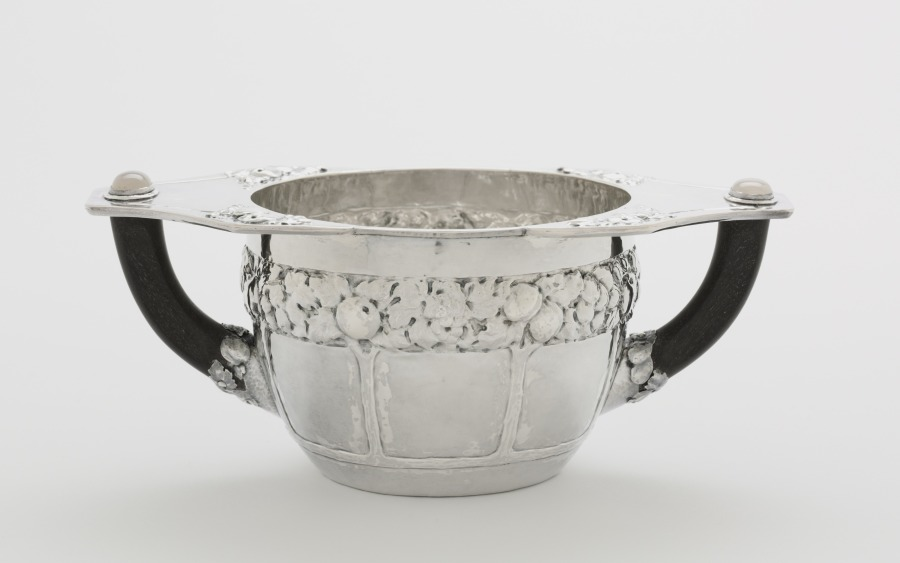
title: Sugar Bowl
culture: America, Ohio, Cleveland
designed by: Louis Rorimer (American, 1872–1939)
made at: and Rokesley Shop (American)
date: c. 1910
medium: silver, moonstones, ebony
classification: Silver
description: This tea and coffee service was designed for production by the Rokesley Shop, a collaborative group working at Louis Rorimer’s studio. Reacting against industrial mass production, Rorimer emphasized inventive design in finely crafted objects.